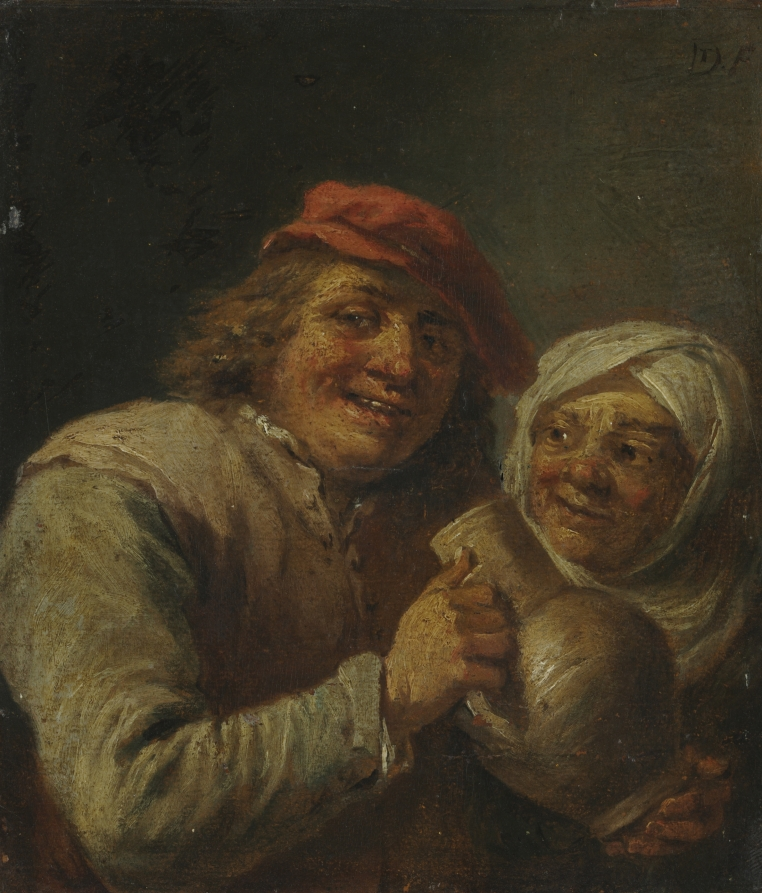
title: Old Man and Woman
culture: Flanders, probably painted in the 18th century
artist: imitator of David Teniers (Flemish, 1610–1690)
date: 1700s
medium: oil on wood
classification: Painting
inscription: Initialed in top right corner with David Teniers's monogram.